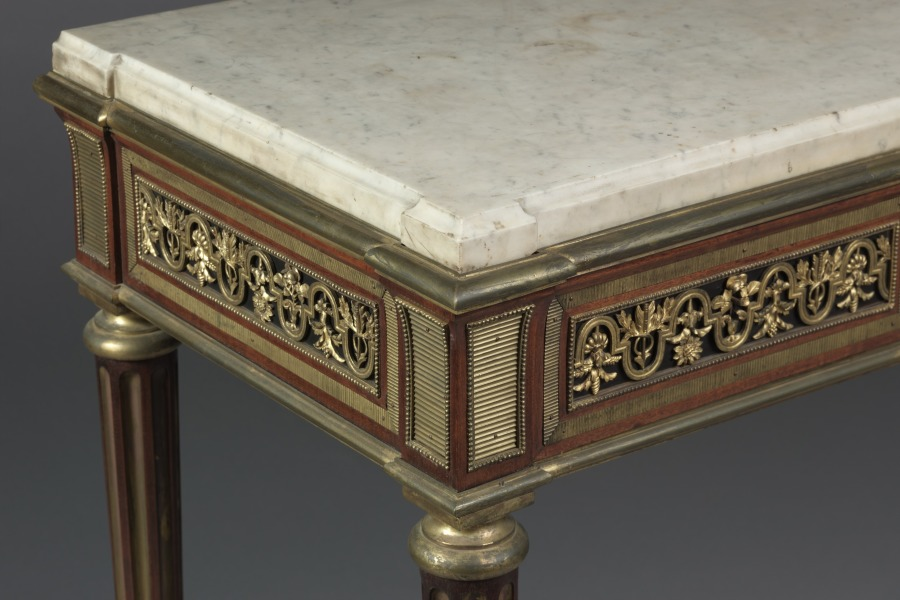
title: Table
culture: France, 18th century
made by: Adam Weisweiler (French, c. 1750–1810)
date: c. 1780–1790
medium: mahogany, gilt bronze, marble top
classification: Furniture and woodwork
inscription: signed twice on back: Weisweiler.